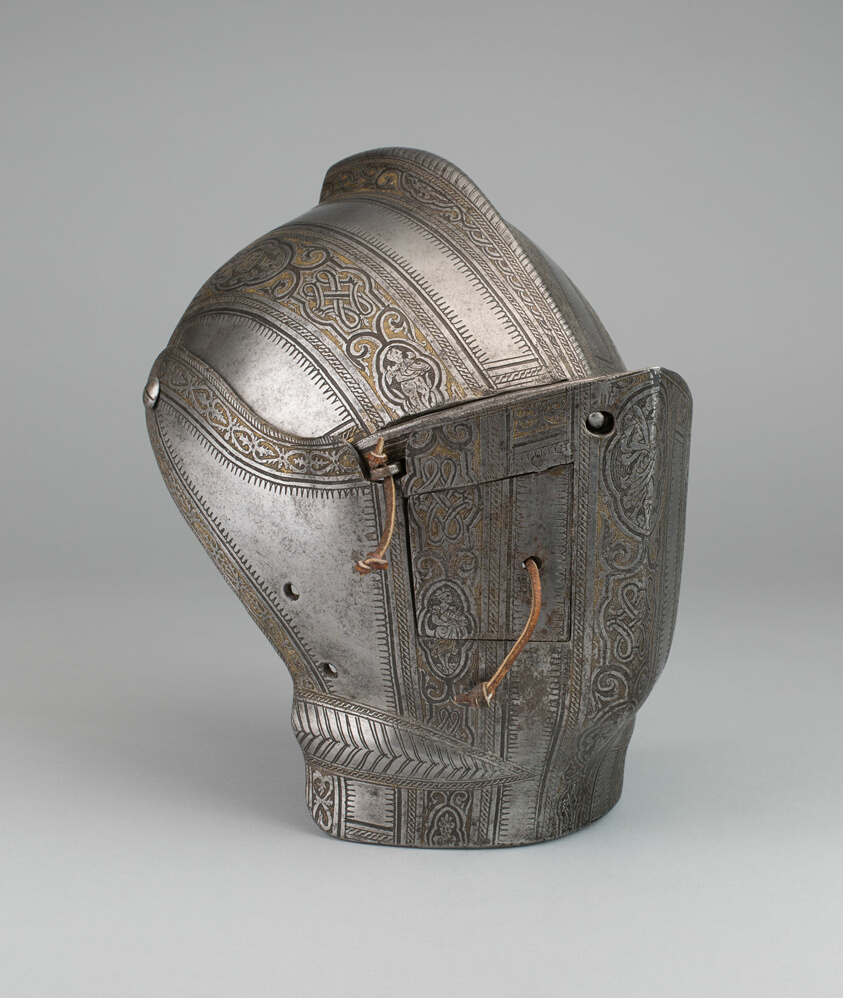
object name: Armor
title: Portions of a Jousting Helmet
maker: Italian; Milan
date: 1570/80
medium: Steel, gilding, and leather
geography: Milan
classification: suit-helmet; armor; arms and armor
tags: knights, helmets, plant-derived motif, figures (representations)